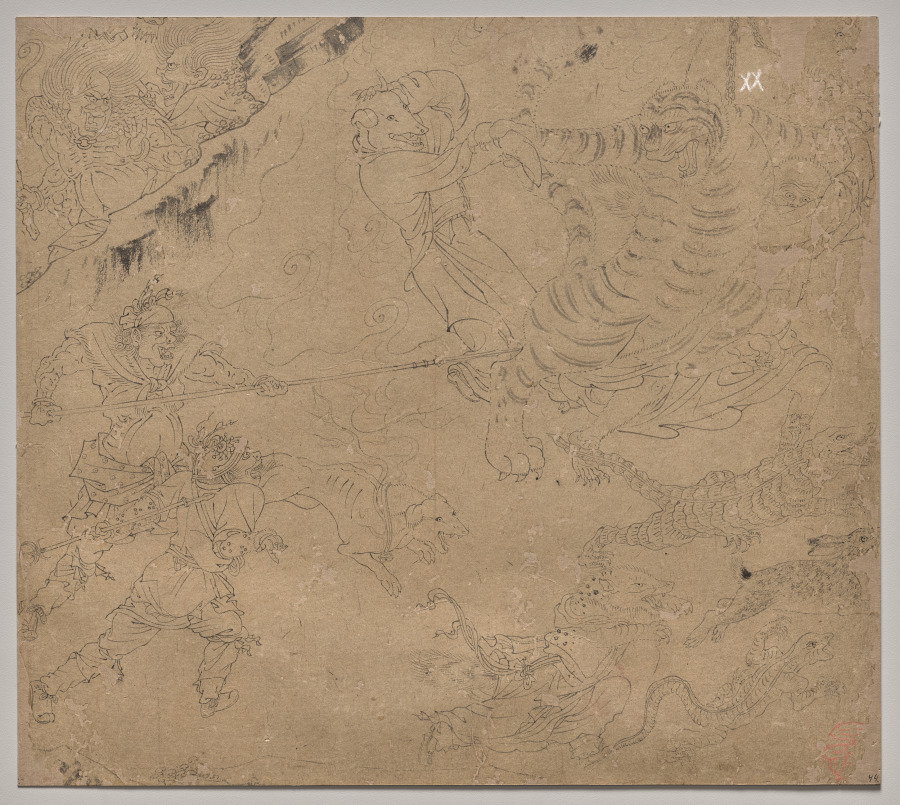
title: Album of Daoist and Buddhist Themes: Search the Mountain: Leaf 44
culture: China, Southern Song dynasty (1127-1279)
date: 1200s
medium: Album, ink on paper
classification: Painting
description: This extraordinary album has 50 paintings on a variety of religious subjects. They were likely created by several master craftsmen to share with studio apprentices as models for fulfilling commissions. The Jade Emperor and the Daoist pantheon make up the first 26 leaves. The next 14 leaves portray the Buddhist Ten Kings of Hell administering punishments to the dead. The third section, called “Clearing the Mountains,” features divine soldiers, led presumably by the deity Erlang Shen 二郎神, fighting undesirable creatures.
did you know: A tiger, confronted by two demon-soldiers with a spear, seizes the sleeve of a half-human creature. Two other soldiers and a hunting dog chase a part-human creature, an alligator, a hare, and a lizard.